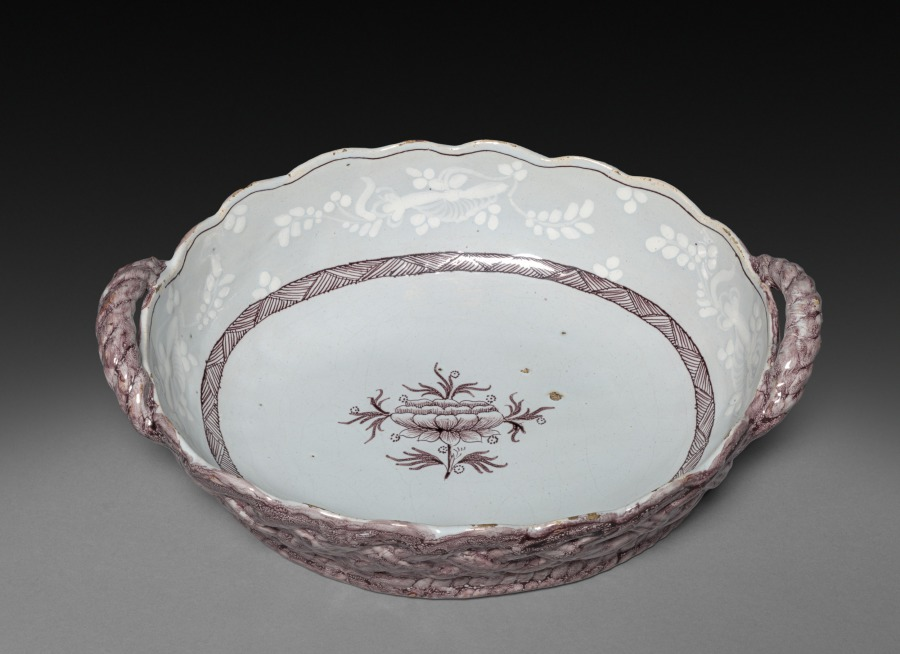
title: Basket-Shaped Bowl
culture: France, 18th century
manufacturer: Saint-Amand-les-Eaux (French)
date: c. 1760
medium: faience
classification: Ceramic